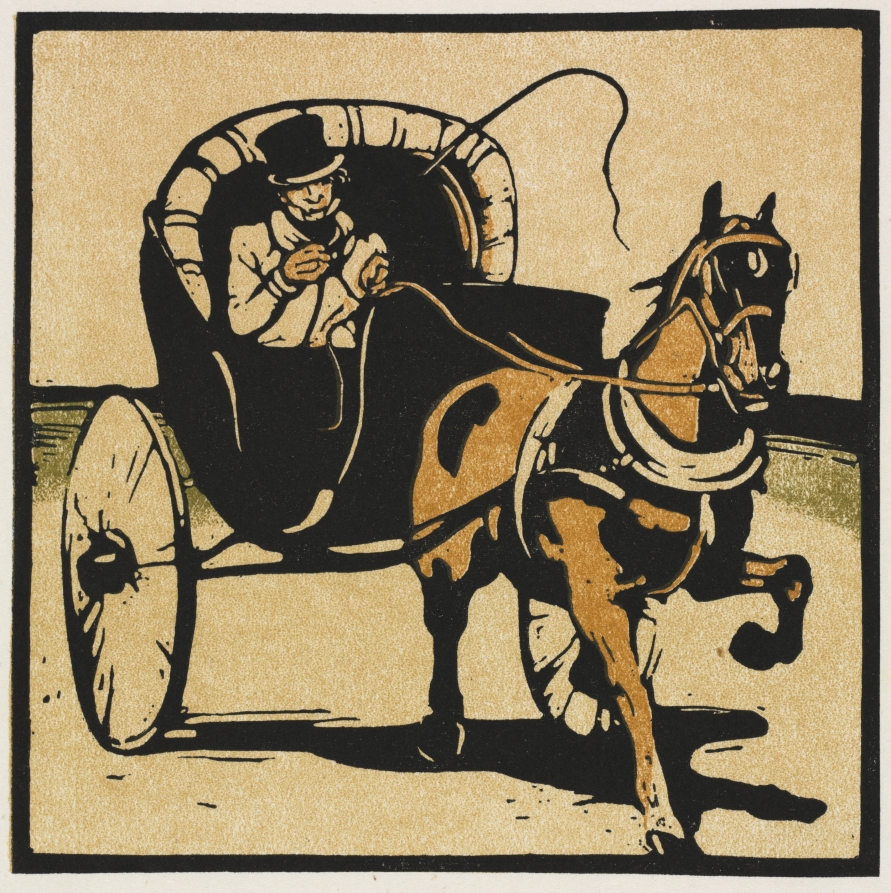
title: The Cabriolet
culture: England, 20th century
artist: William Nicholson (British, 1872–1949)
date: 1897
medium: color woodcut and lithograph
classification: Print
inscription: In pencil, top right (not artist's hand): "5123" Lower margin, in pencil: "WOODCUT BY W NICHOLSON PUB STUDIO 1898" Printed lower right: "THE STUDIO in a circle, no studio drystamp"